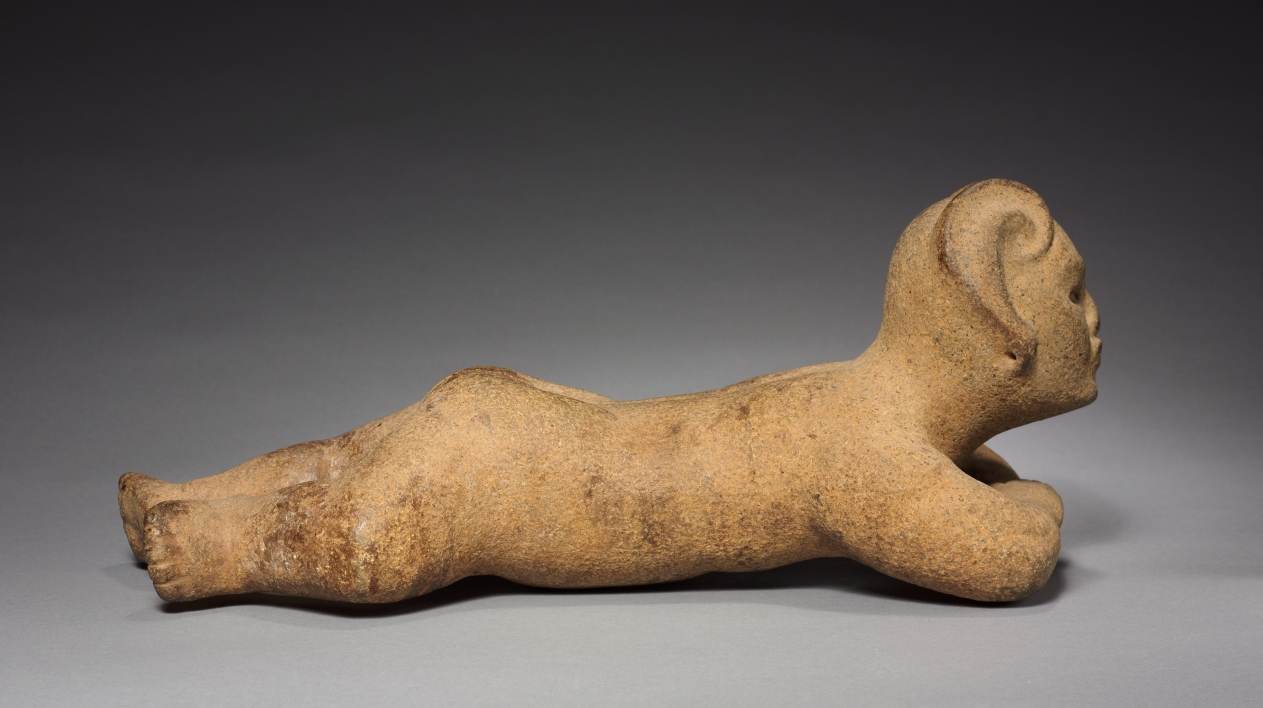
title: Reclining Figure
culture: Mexico, Gulf Coast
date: 300–600 CE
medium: stone, pigment traces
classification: Sculpture